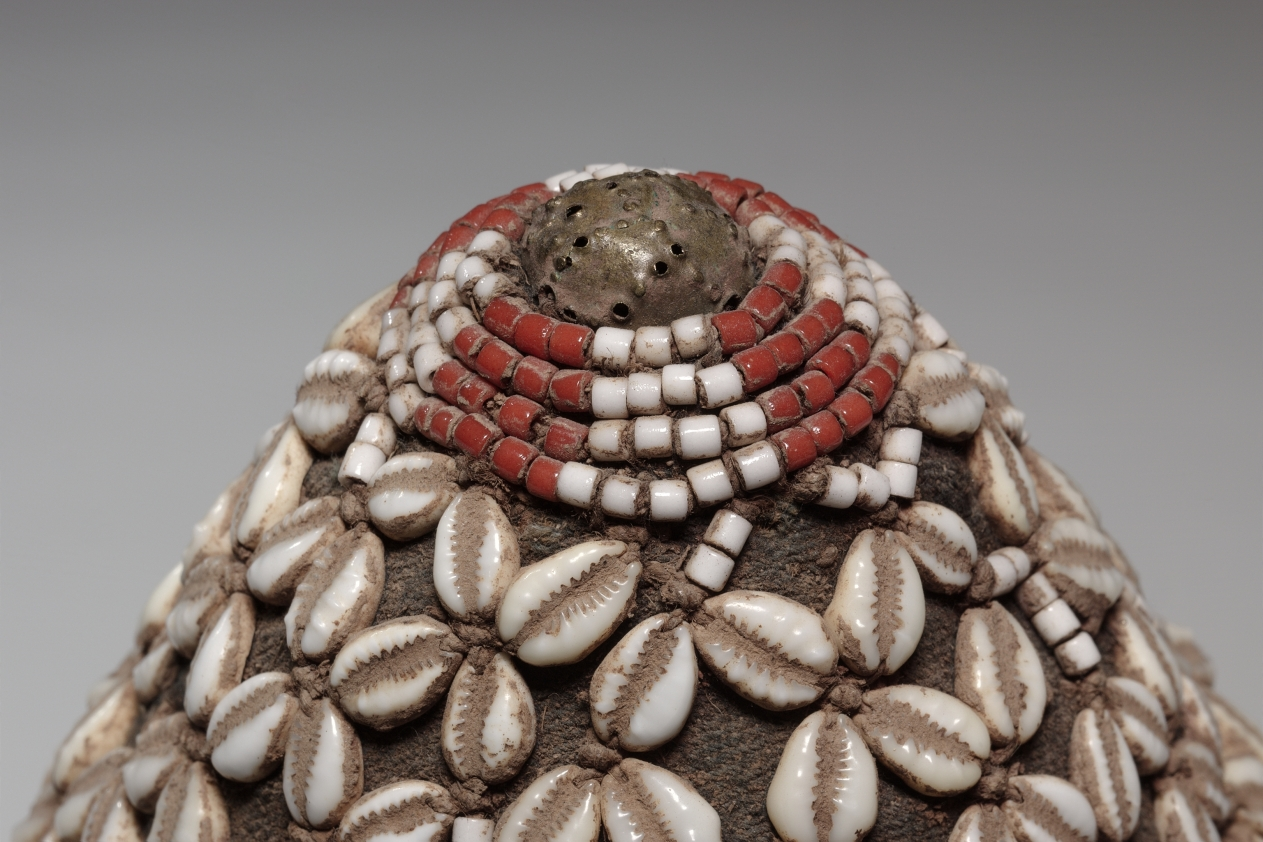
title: Cap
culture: Africa, Central Africa, Democratic Republic of the Congo, Kuba-style maker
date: early 1900s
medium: Plant fibers, cloth, glass beads, cowrie shells, and copper alloy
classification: Garment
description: Costumes worn by the Kuba king, members of his family, and the nobility are spectacular. Raffia cloth, leopard skin, feathers, beads, and cowrie shells are combined in magnificent ensembles used for specific ceremonial roles. Beaded caps of this sort are worn only by members of the royal family. When not in use, they are preserved in royal storehouses.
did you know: The beads and shells on this cap were imported from outside of central Africa.